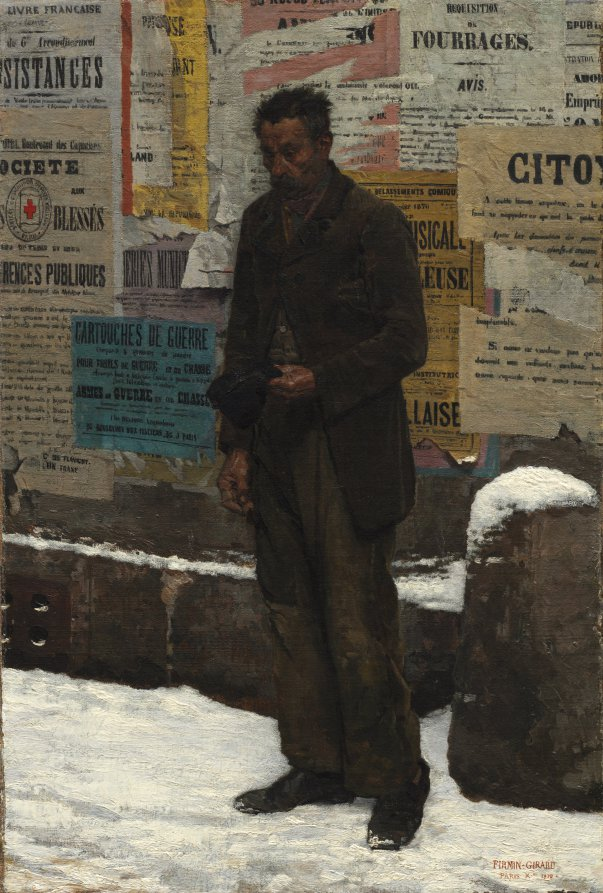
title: The Veteran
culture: France, 19th Century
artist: Marie-François Firmin-Girard (French, 1838–1921)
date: 1870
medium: oil on canvas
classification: Painting